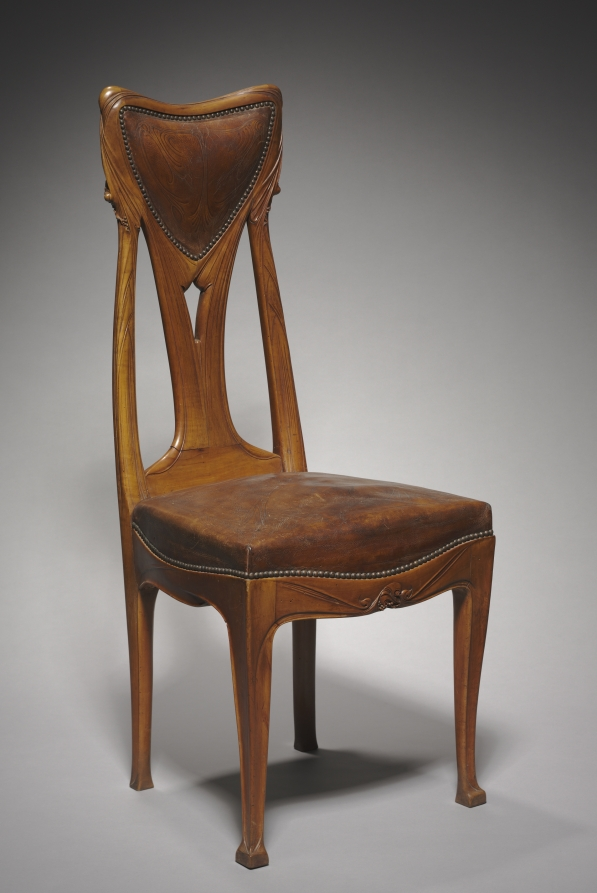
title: Chair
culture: France, 20th century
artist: Hector Guimard (French, 1867–1942)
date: c. 1907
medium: pearwood with tooled leather back and seat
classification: Furniture and woodwork